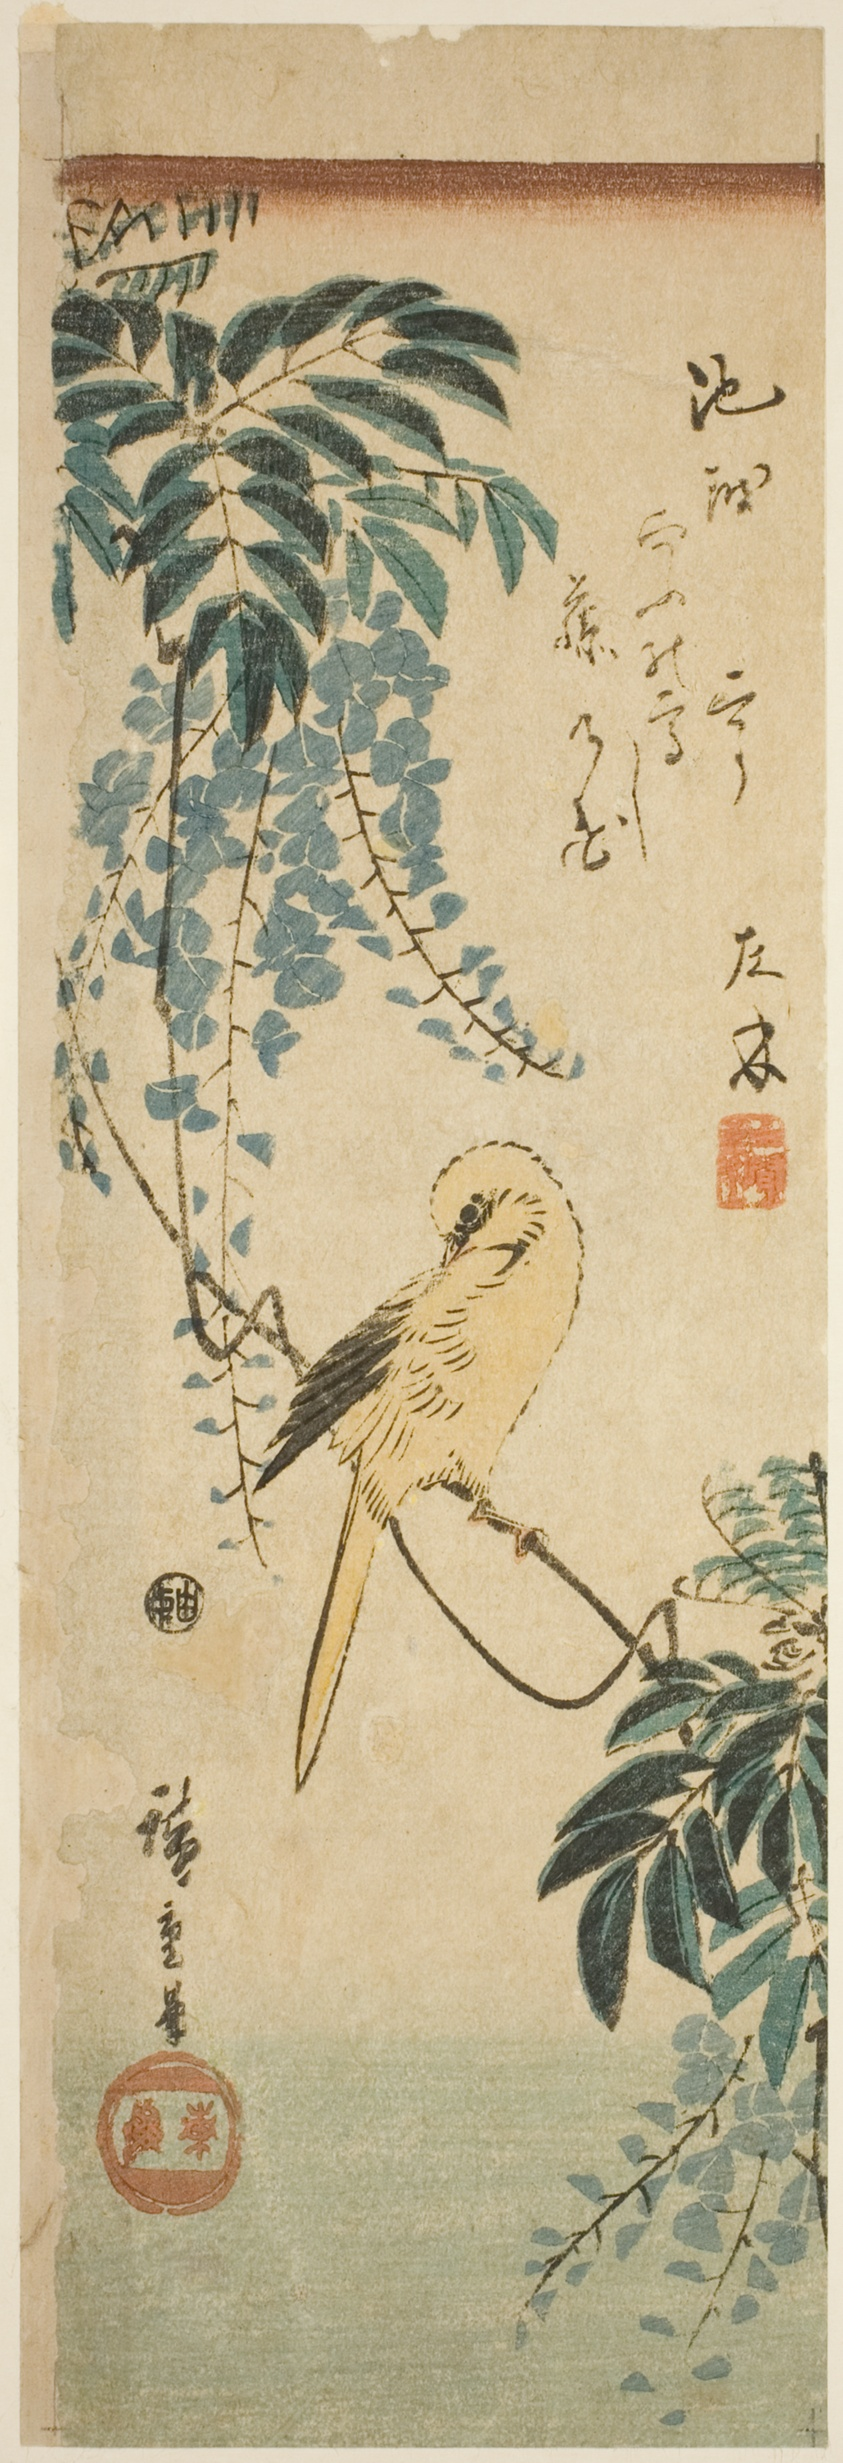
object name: Print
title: Canary and wisteria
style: Japanese (culture or style)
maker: Utagawa Hiroshige 歌川 広重; Japanese, 1797-1858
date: c. 1843/47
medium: Color woodblock print; aitanzaku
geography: Japan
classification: woodblock print; print; asian art